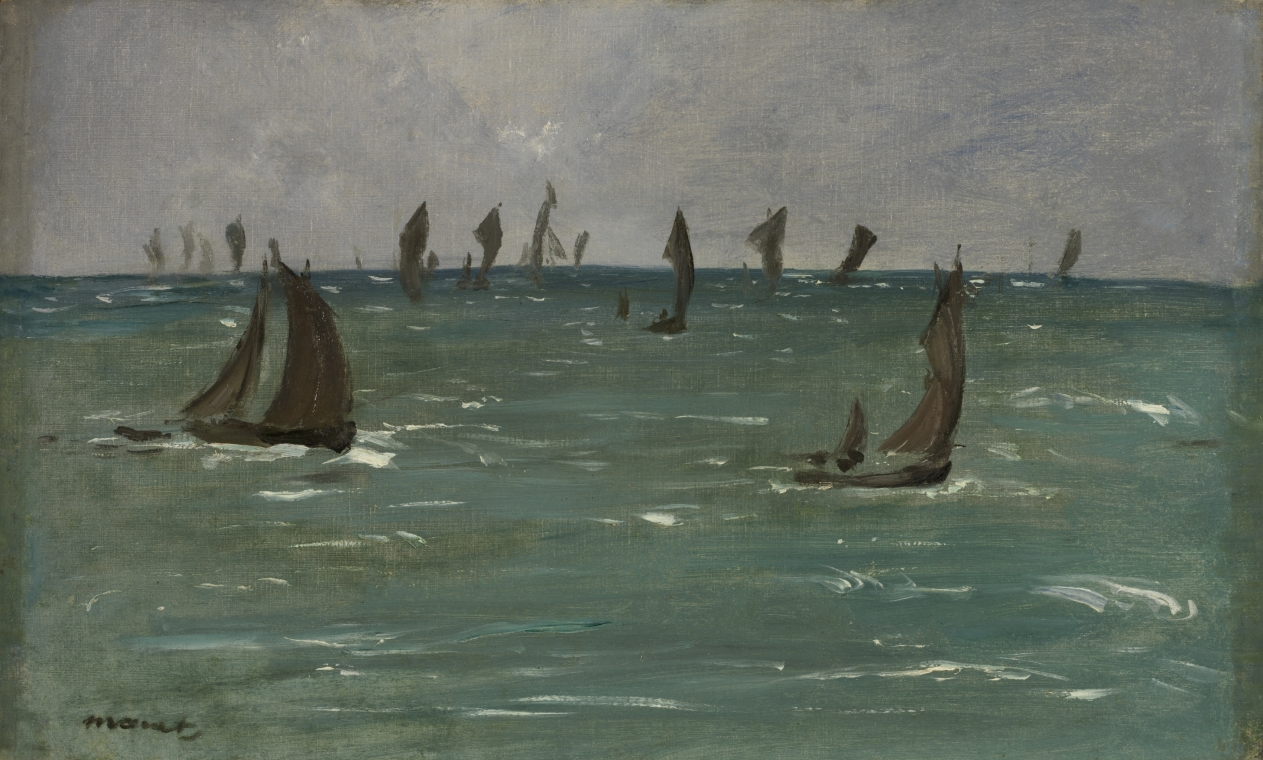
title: Boats at Berck-sur-Mer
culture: France, 19th century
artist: Édouard Manet (French, 1832–1883)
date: 1873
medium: oil on fabric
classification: Painting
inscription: Signed lower left: Manet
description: Ever since his childhood, Manet spent almost every summer at the seashore. At age 16, after failing the entrance exam for the naval academy, he embarked as an apprentice on a training ship, traveling as far away as Rio de Janeiro. The sea would always capture his imagination, and in 1864 he painted several seascapes. This painting was made nearly ten years later, while the artist was staying in Berck-sur-Mer, near Boulogne. Exploring light and movement, he rapidly sketched the sails of the countless ships that dance in the wind on blue-green waves highlighted with white. Manet even added a slight curve to the horizon, thus conveying an impression of infinite space, despite the painting's small size.